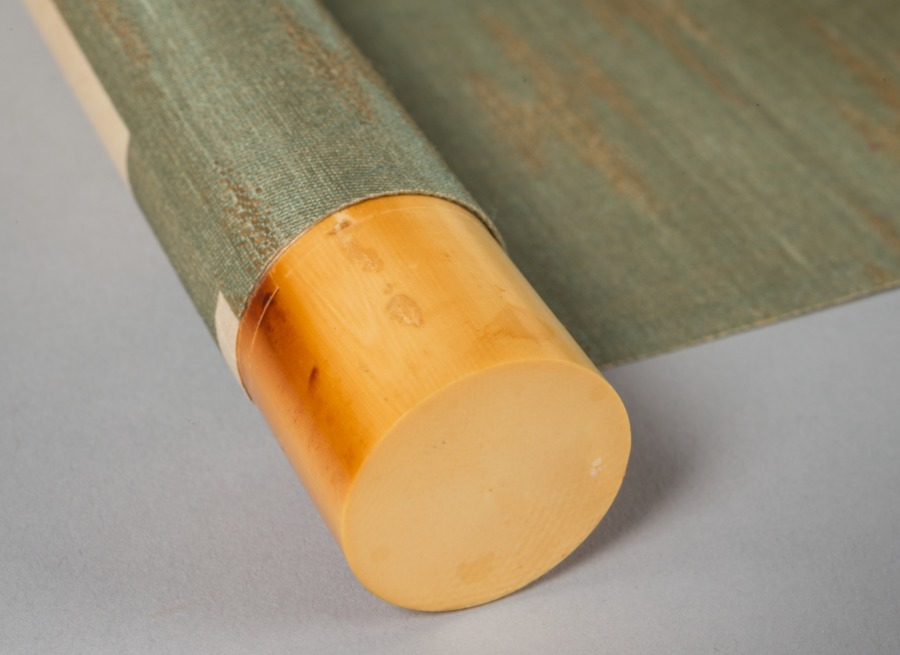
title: Shennong (Shinnō)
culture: Japan, Muromachi period (1392–1573)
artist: Shōryō (Japanese)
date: late 1400s–early 1500s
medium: hanging scroll; ink on paper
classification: Painting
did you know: Shennong legendarily taught people how to farm and also how to use plants as medicine.